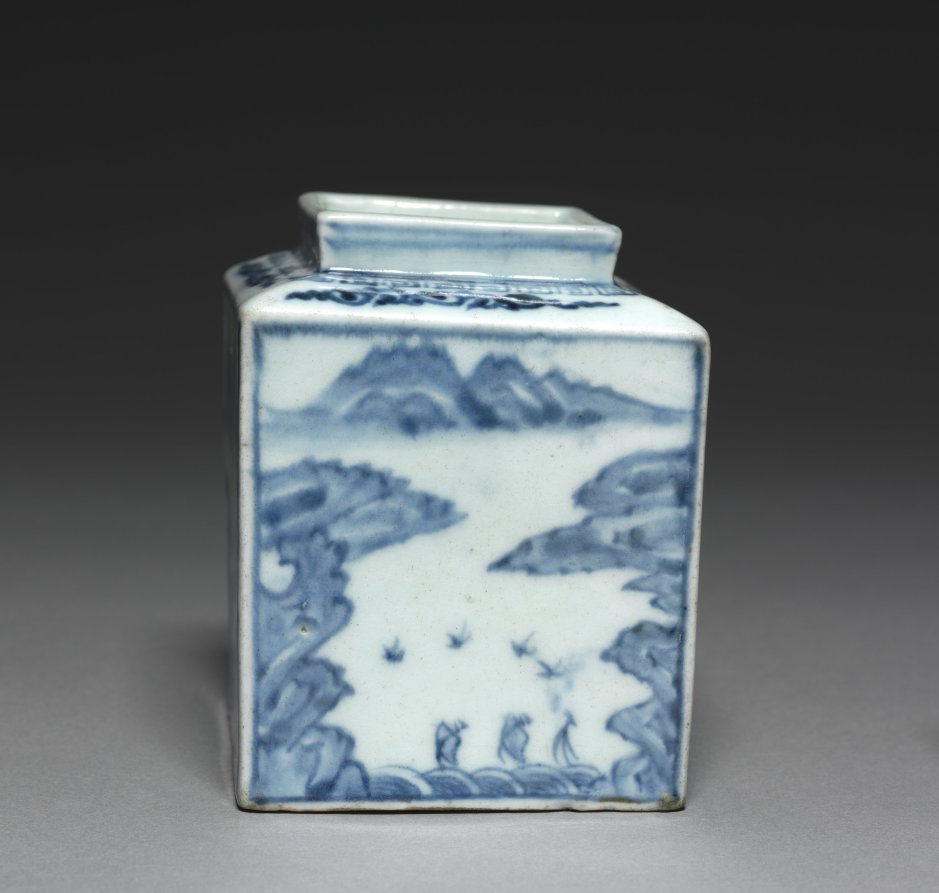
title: Square-shaped Bottle with the Scenery of the Han River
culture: Korea, Joseon dynasty (1392–1910)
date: 1800s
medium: porcelain with underglaze cobalt blue decoration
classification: Ceramic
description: The depicted scenery of this bottle is the Han River, the principal river crossing the center of Seoul. Since the 1700s, Korean artists began to paint the real landscape of Korea instead of imaginary ones of the Chinese tradition. This blue-and-white porcelain bottle is presumably a water dropper for ink. Each facet was separately made and put together before firing in a kiln. Both the landscape motif and faceted bottle were in vogue in the late 19th century, largely produced to meet the growing demand from the elite class.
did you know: The Han River is the principal river crossing the center of Seoul.